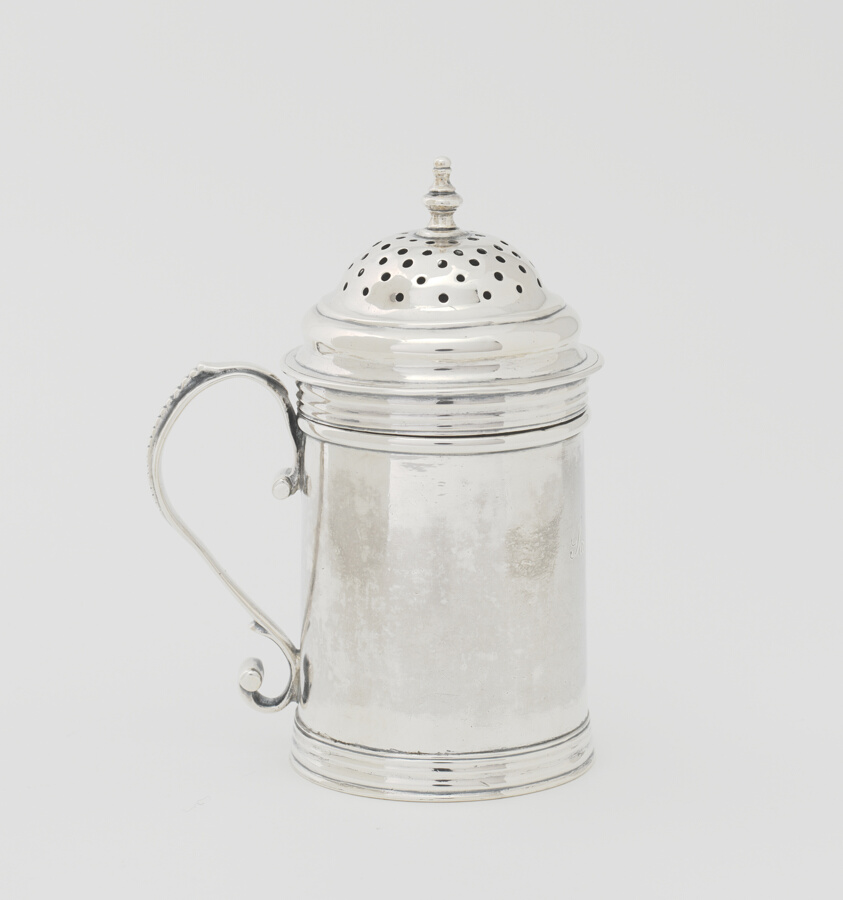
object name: Metalwork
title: Pepper Box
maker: William Cowell, Sr.; American, 1682/83–1736; Boston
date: c. 1720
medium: Silver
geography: Boston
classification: container; box; silver; american decorative arts; american arts; decorative arts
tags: dining, drinking